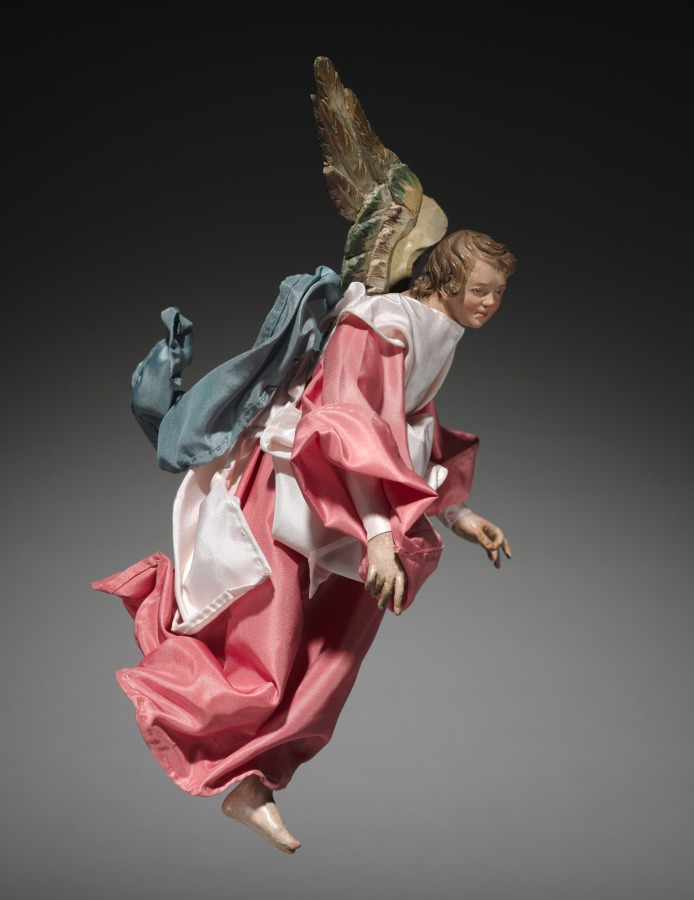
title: Figure from a Crèche: Angel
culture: Italy, Naples, late 18th-early 19th century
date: 1780–1830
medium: painted wood and terracotta with various textiles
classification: Sculpture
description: The practice of creating scenes of the Nativity for the home dates from the early 1700s in Italy, where people began to set up doll-like figures of about a foot or less in height. The custom was particularly popular in Naples around 1800, where crèche scenes (crèche means cradle, or crib) included many figures, whose heads and hands of painted terracotta, stuffed cloth bodies, and clothing adapted from contemporary local costumes gave them an amazingly realistic character. Representations of the birth of Jesus can be traced to the first few centuries of Christianity. Both living creatures and sculptural depictions of them were used from early times. By the late middle ages it was customary to create life-size figures of wood or stone, naturalistically painted, to represent the characters who participated in the events of Jesus's early life. These sculptures were then arranged in scenes illustrating one or both of the most important of these events, the Adoration of the Shepherds and the Adoration of the Magi-the three kings from the East who came to pay homage to the Christ child. Used in churches, these large figures were especially popular in Italy, Central Europe, Spain, and Portugal. This Object in Focus presentation was organized by Henry Hawley, Curator of Renaissance and Later Decorative Arts and Sculpture.